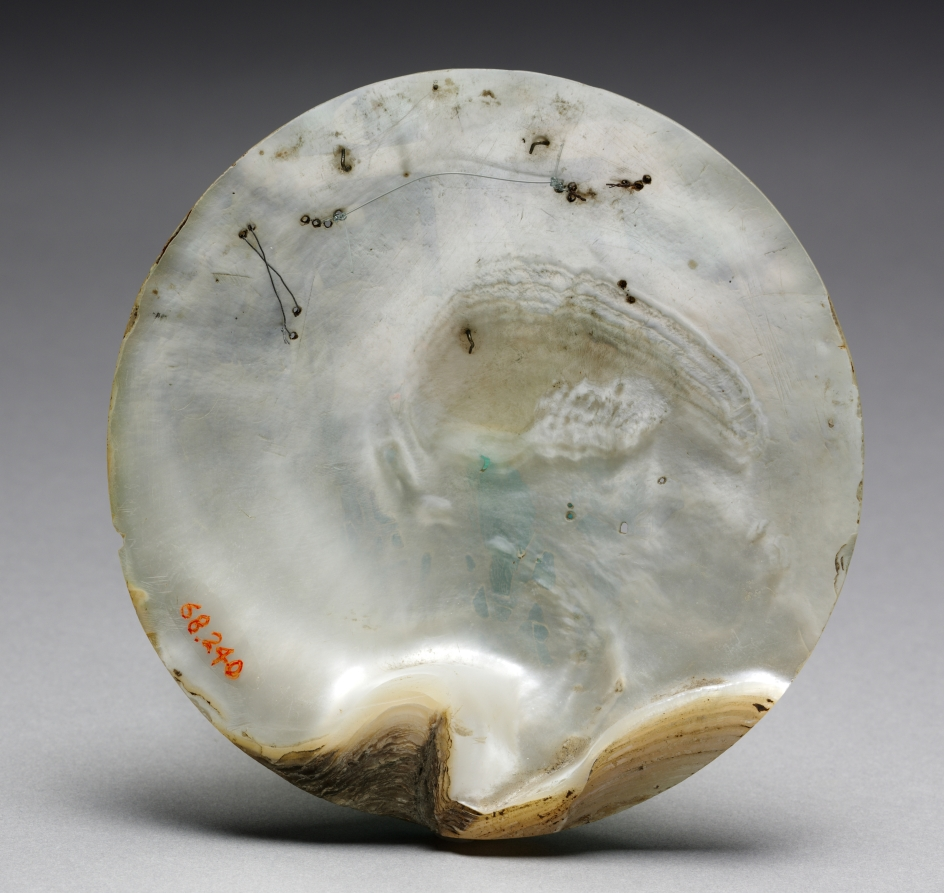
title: Calvary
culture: Germany, Middle Rhine?, 15th century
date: c. 1450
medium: mother-of-pearl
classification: Sculpture